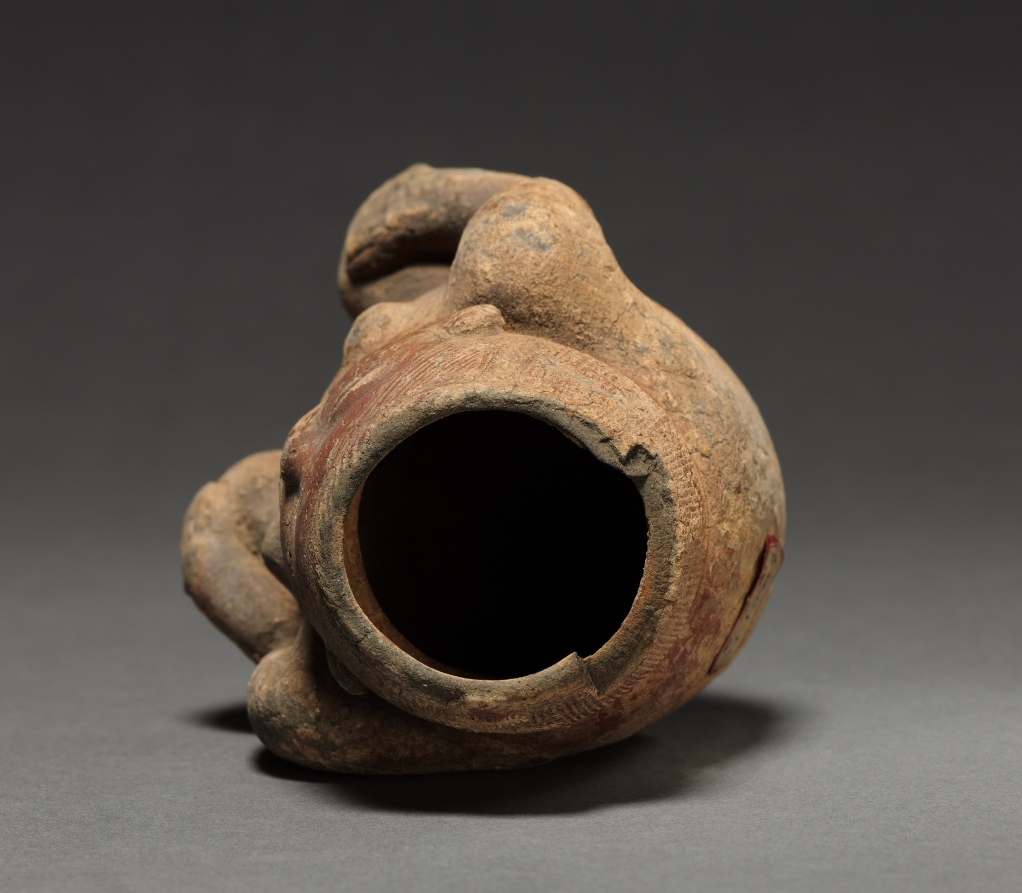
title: Figure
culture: Colombia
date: before 1550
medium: red ware with incised patterns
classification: Ceramic